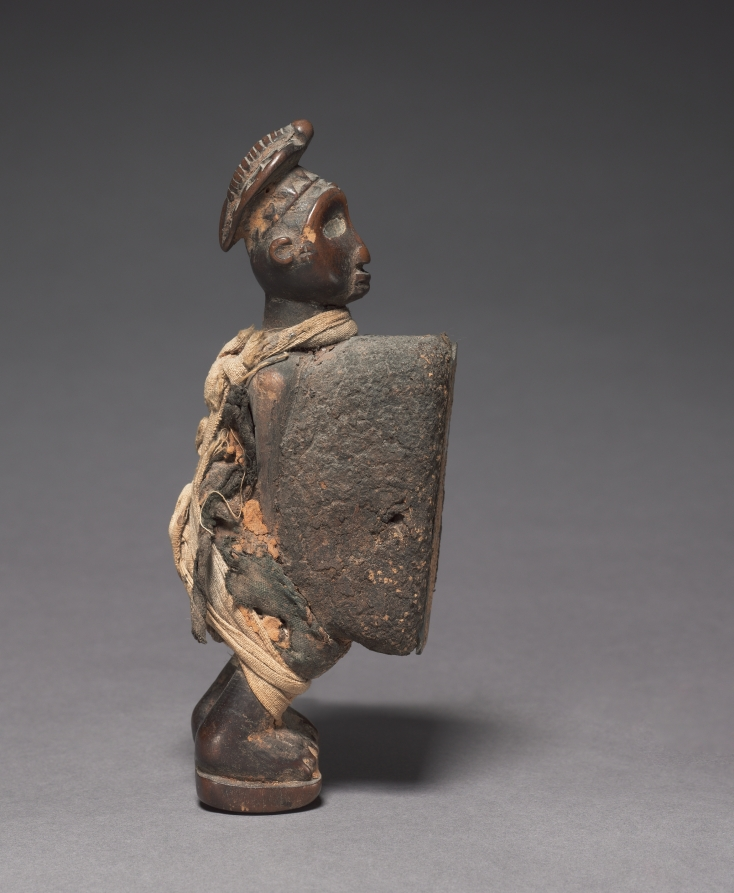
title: Male Figure (Nkisi)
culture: Africa, Central Africa, Democratic Republic of Congo (most likely), Cabinda, or Republic of the Congo, probably Yombe-style maker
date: late 1800s-early 1900s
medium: Wood, organic material (including resin), metalized glass, and cloth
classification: Sculpture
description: Nkisi is often associated with the word spirit, as these figures are believed to host a variety ancestral spirits. With an intact mirror-covered stomach cavity, this figure was not decommissioned before sale or disposal, deeming its particular powers sustained. The cloth knots and carvings suggest that it was used to bind agreements or oaths, and to reconcile social and cosmological contradictions.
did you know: The medicinal substances remain intact in this particular figure, which is rare, as most were decommissioned before museum acquisition.